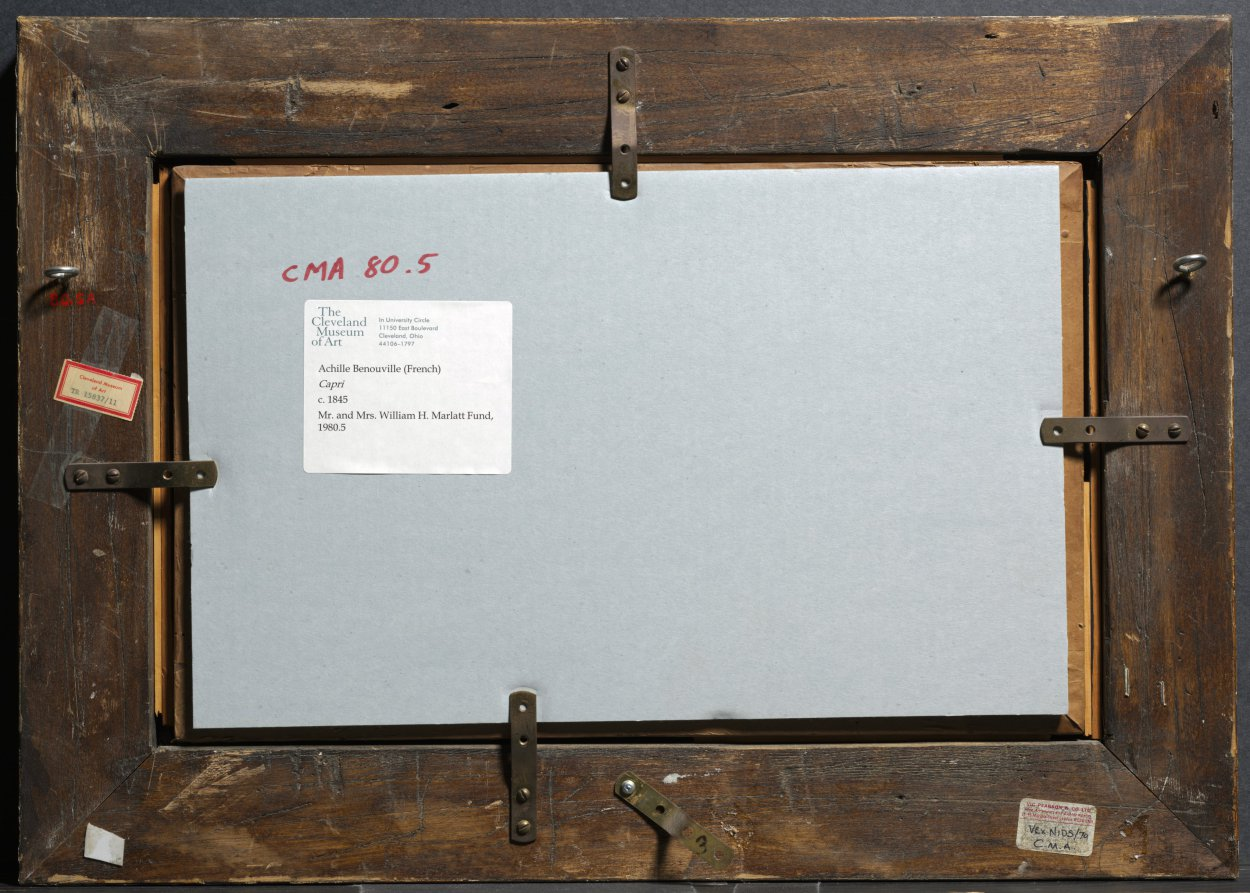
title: Capri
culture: France, 19th century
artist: Jean Achille Benouville (French, 1815–1891)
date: c. 1845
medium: oil on fabric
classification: Painting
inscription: Signed lower right: Achille Benouville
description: Located in the Mediterrean Sea, south of Rome, the island of Capri has been famous since Roman times for its spectacular scenery and mild climate. In the 19th century it became the home of many European nobles, and attracted artists from across the continent. Here Benouville captured the beauty of the island's rocky coastline, focusing his attention on a path leading toward the city of Capri and past the rocky outcropping of Monte Solaro. Fascinated by the Italian landscape, Benouville spent years in Italy drawing and painting the countryside. From 1838 to 1845 he made at least three trips there, and in 1845, after winning the Prix de Rome—a fellowship allowing promising artists to study in that city—he spent much of the next 25 years in Italy. Although trained to paint landscapes in a very formal manner, after leaving France Benouville began to paint his subjects with a much more personal, nontraditional approach. This may account for this picture's unusual composition, in which much of the canvas is given to indistinct but beautifully painted stone, sky, and water.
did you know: A pair of figures rest on the right side of the composition—both in white garments, taking in the refreshing scent of the sea air.